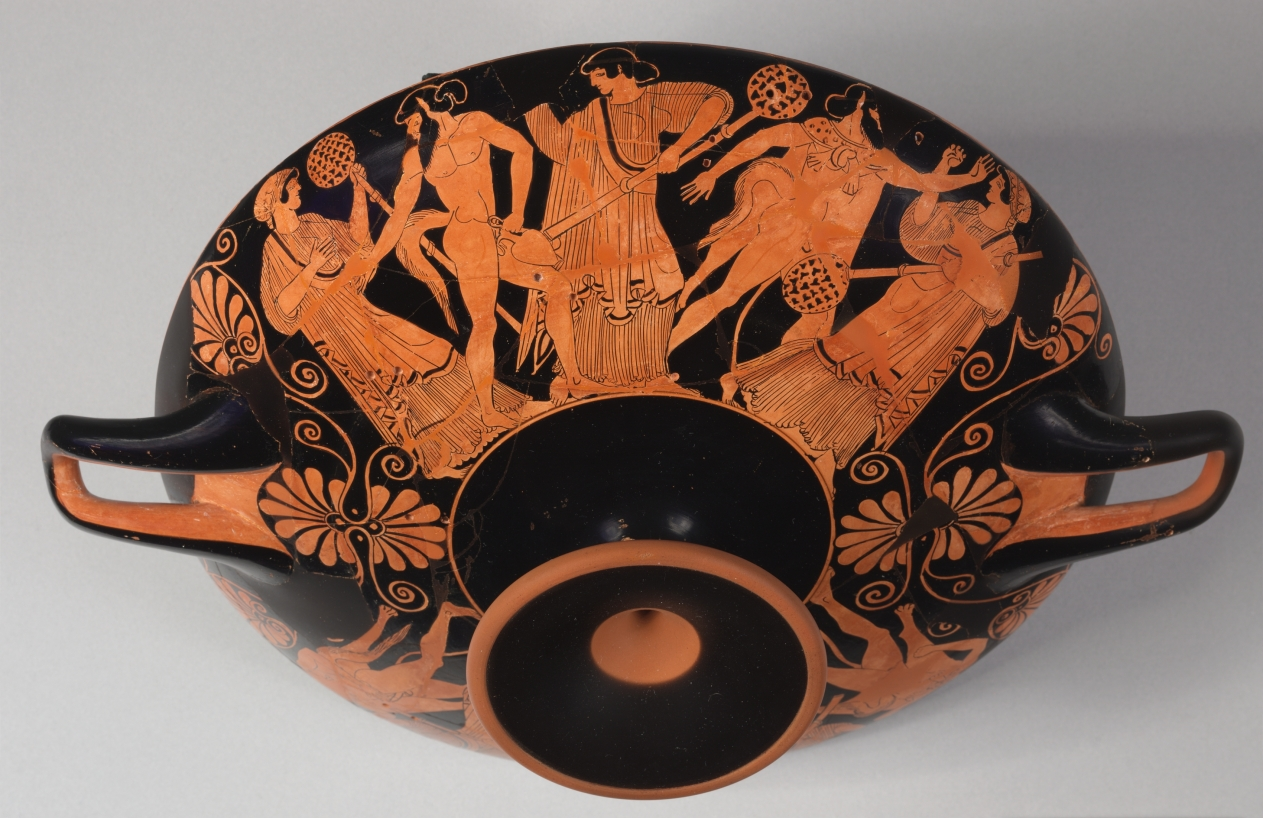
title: Red-Figure Kylix (Drinking Cup): Dionysos and Satyr (I); Satyrs and Maenads (A, B)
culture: Greece, Athens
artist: attributed to Douris (Greek, Attic, active c. 500–470 BCE)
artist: or Painter of London E 55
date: c. 480 BCE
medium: ceramic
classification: Ceramic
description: Reconstructed from 72 fragments, this cup has been repaired several times, indicating its enduring value to owners. Pairs of holes straddling cracks once held ancient wire or clamp repairs. Numerous incomplete holes may signify recent interventions. Early modern efforts to hide cracks and certain features of the satyrs that could have offended sensibilities of the time also masked the original artistry of its painting. So, for many years the cup languished in storage. Cleaning and reconstruction in 1952–53 revealed enough to allow attribution to a respected vase painter, Douris, reviving the cup’s reputation. More recently, a different attribution has been suggested, and a new conservation campaign replaced ancient parts from a different cup with modern reconstructions more like those lost.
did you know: In the tondo, a dancing satyr approaches the wine god Dionysos, who holds a kantharos and grapevine.